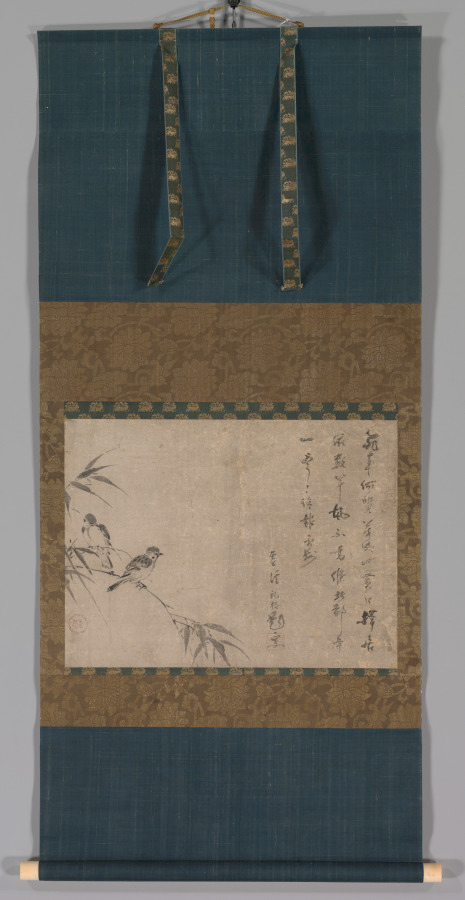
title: Sparrows and Bamboo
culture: Japan, Muromachi period (1392–1573)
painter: Shiken Saidō (Japanese, 1486–1581)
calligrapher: calligraphy by Ekkei Reikaku (Japanese, d. 1609)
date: mid- to late 1500s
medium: hanging scroll; ink on paper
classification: Painting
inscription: signed: Ekkei Reikaku daishi owaru inscription sealed: Reikaku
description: Shiken Saidō, whose style name was Ze'an, was a Zen monk who trained at Shōkokuji temple in Kyoto, and designed the garden of Reiun’in at Myōshinji temple. He painted landscapes in the style of painter and art advisor to the shogun, Sōami (died 1525), as well as bird-and-flower compositions. A poetic inscription by the monk Ekkei Reikaku accompanies this gentle composition of two sparrows perched on bamboo.